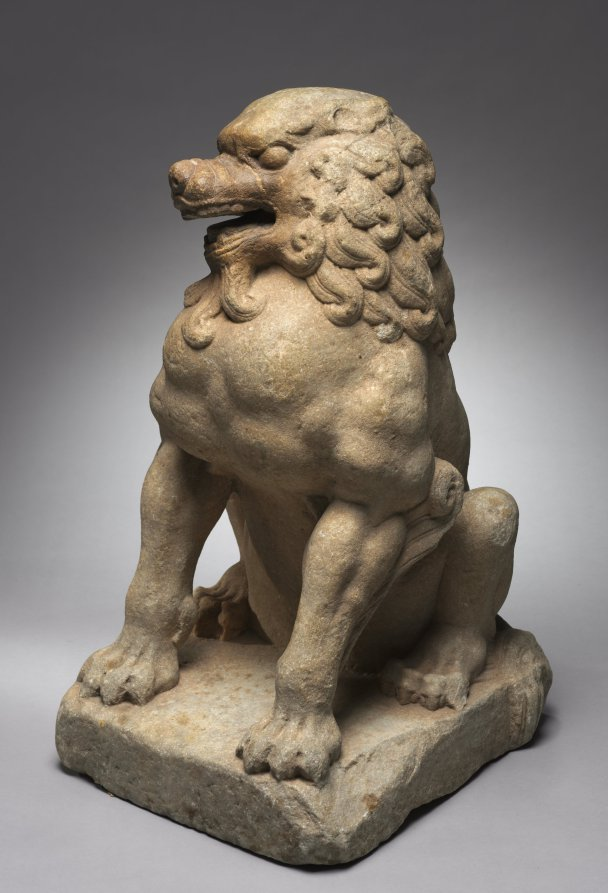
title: Guardian Lion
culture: China, Tang dynasty (618-907)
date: c. 600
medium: white marble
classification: Sculpture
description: Lion sculptures like this example are often found at the entrance to Buddhist temples in China. It may seem as if they are there to protect the temple. Lions also have had strong associations with Buddhism since the religion’s origin; the dharma, or Buddhist doctrine, is said to be spread through his roar.